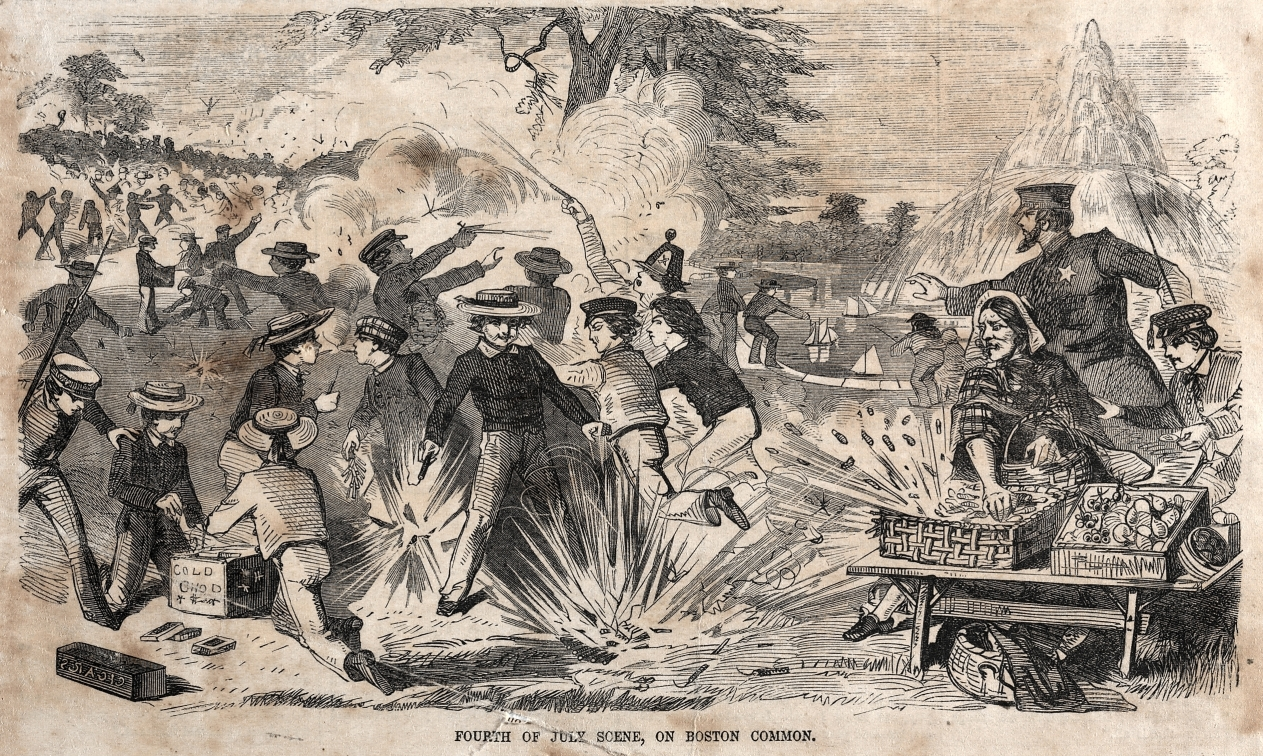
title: Fourth of July Scene, on Boston Common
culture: America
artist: Winslow Homer (American, 1836–1910)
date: 1859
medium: wood engraving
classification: Print